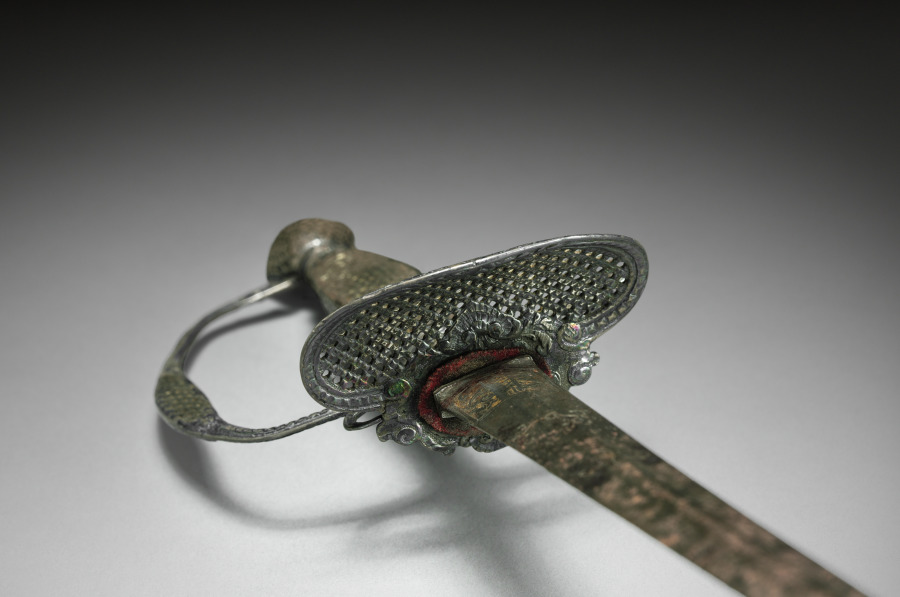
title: Child's Sword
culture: France, Paris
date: c 1780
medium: stainless steel, silver and brass wire inlay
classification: Arms and Armor